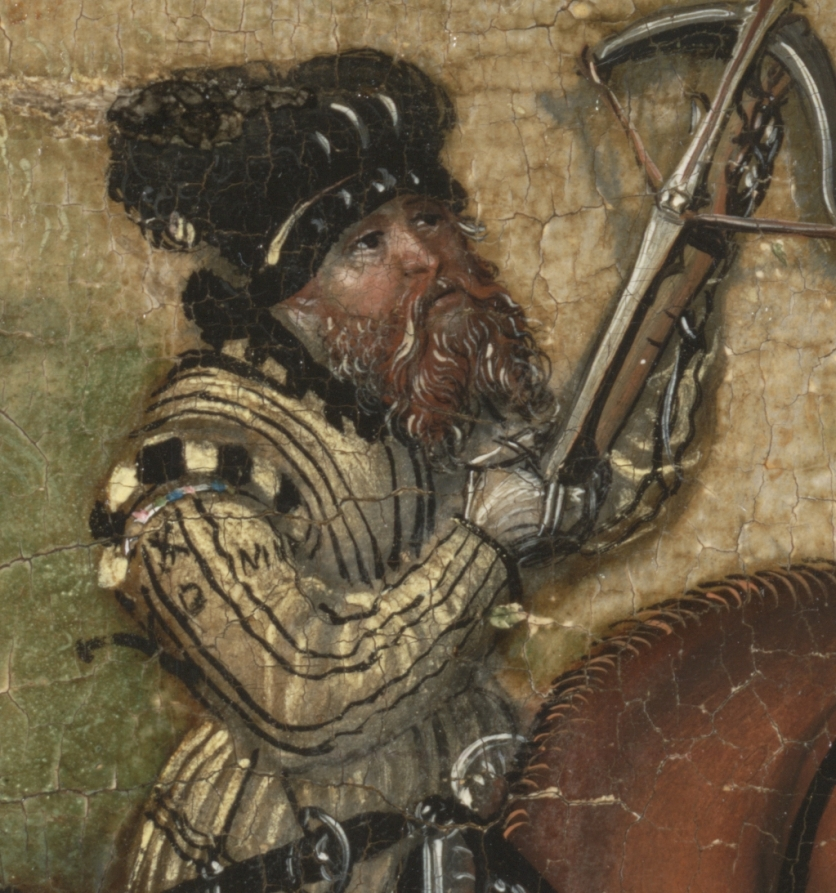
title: Hunting near Hartenfels Castle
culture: Germany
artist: Lucas Cranach (German, 1472–1553)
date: 1540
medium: oil, originally on wood, transferred to masonite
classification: Painting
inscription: Signed lower right on boat with a winged serpent, and dated: 1540 [inventory number, lower right: 1577]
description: The Protestant rulers of Saxony commissioned this animated hunt scene, set near their residence seen in the background, Hartenfels Castle (in eastern Germany). John Frederick the Magnanimous, in the bottom left corner, wears dark green hunting attire; he spans his crossbow and waits for his courtiers and dogs to chase a stag across the river. His wife, the Electress Sibylle, stands at right, poised to take the first ceremonial shot. The prince electors of Saxony were passionate practitioners of hunting with dogs—elaborate, highly rehearsed occasions, coordinated by the use of signals from hunting horns. Cranach dated this work and his signature is the winged snake at lower right. 1577 in the right corner is an inventory number.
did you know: Humans, dogs, and deer make up most of the creatures in this busy scene—but not all of them! Look closely at the background to spot a bear and three boars.